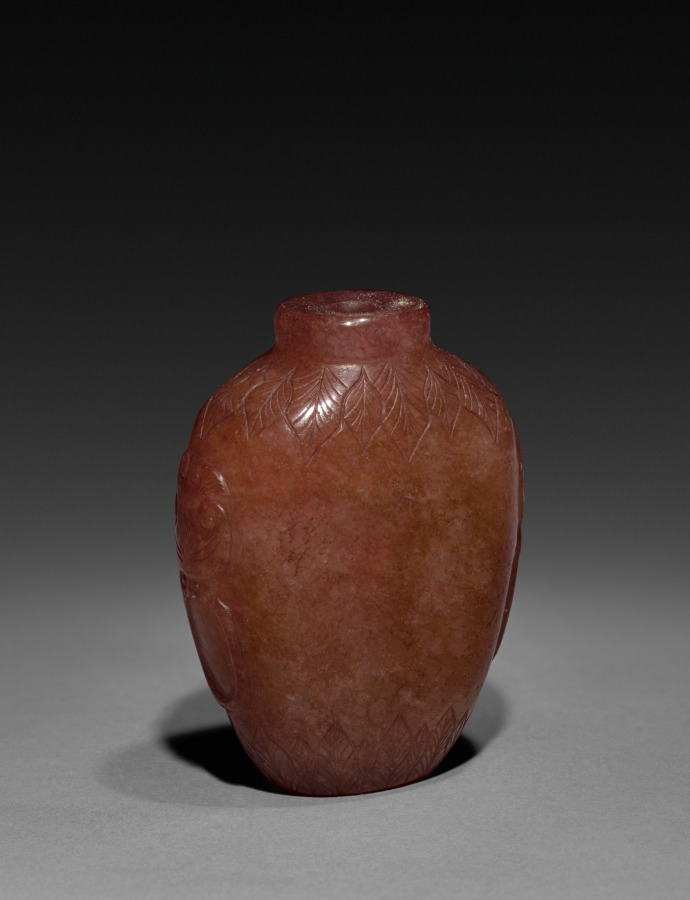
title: Snuff Bottle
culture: China, Qing dynasty (1644-1911)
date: 1644–1911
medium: glass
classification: Glass